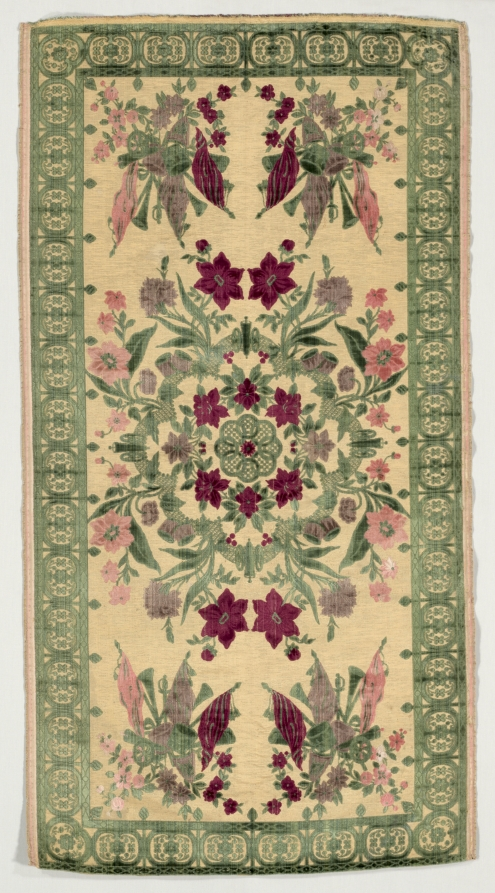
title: Cushion Cover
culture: Italy, Genoa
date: 1700s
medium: velvet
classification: Velvet